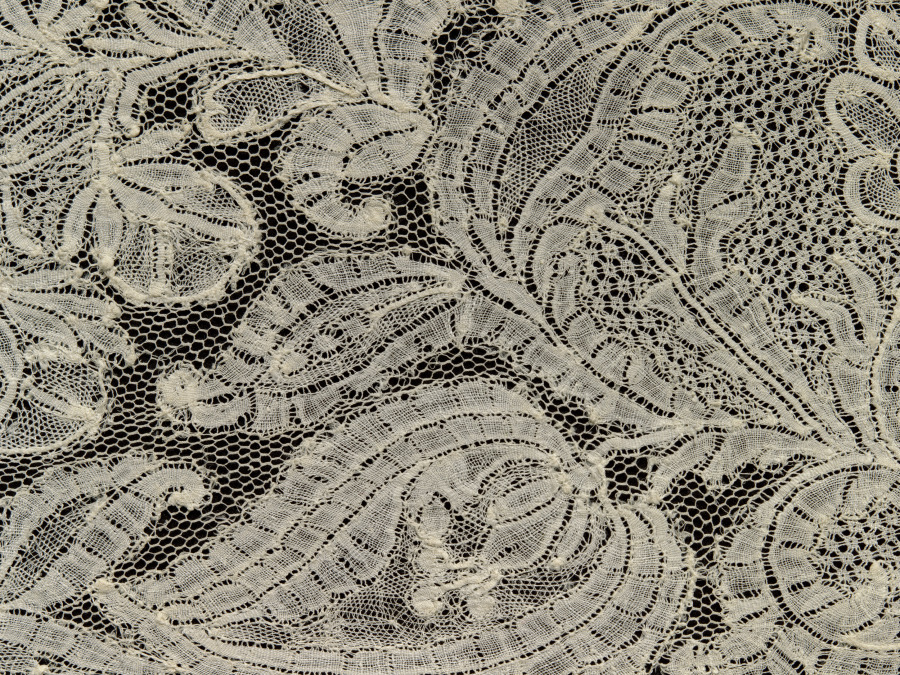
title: Lace Lappet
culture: Belgium, Brussels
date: 1700s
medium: Linen: bobbin lace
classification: Lace